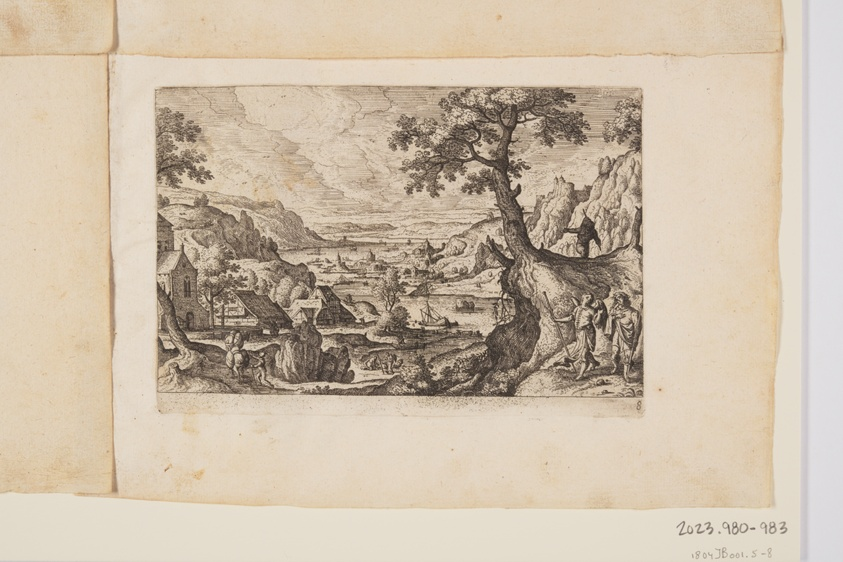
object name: Print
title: Plate 8, from Landscapes with Scenes from the Old and New Testament and Ovid’s Metamorphoses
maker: Hans Bol (Flemish, 1534–1593); published by Philip Galle (Flemish, 1537–1612)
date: 1574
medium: Etching on ivory laid paper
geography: Flanders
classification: print; paper; prints and drawing; etching